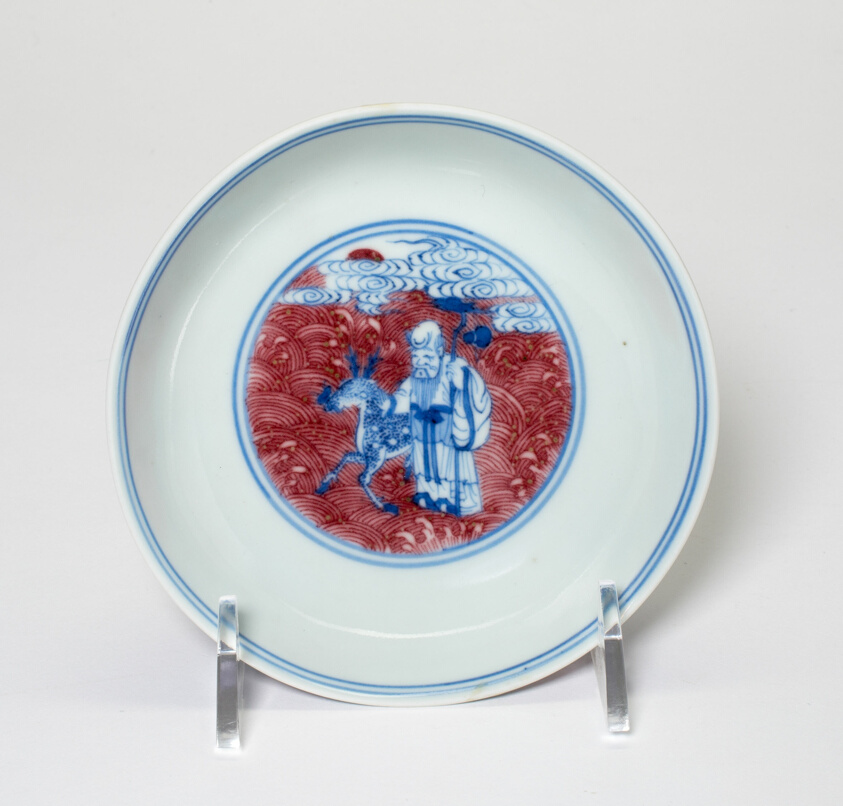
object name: Vessel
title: Underglaze-blue and red 'immortals' dish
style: Chinese (culture or style)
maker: China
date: 19th century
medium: Porcelain painted in underglaze blue and red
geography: China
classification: dish (vessel); asian art; ceramics; porcelain; vessel